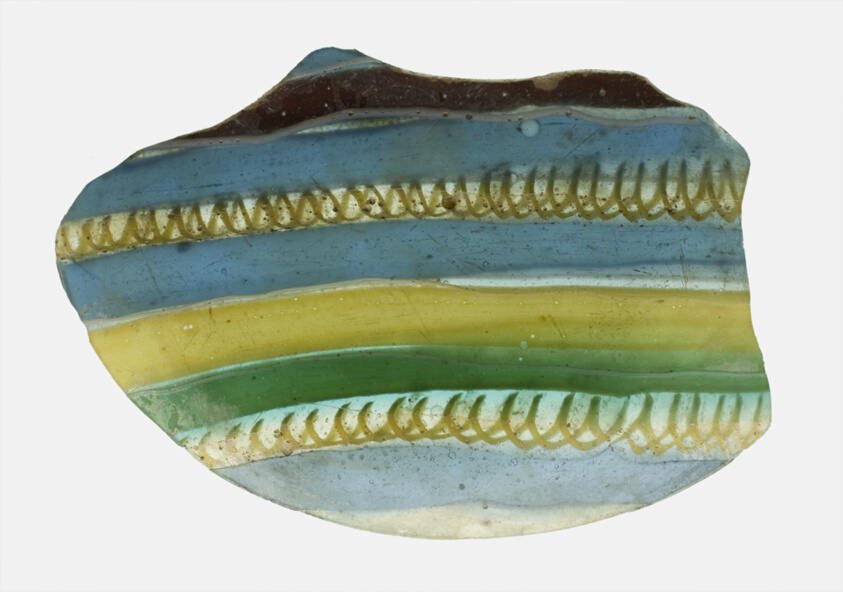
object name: Decorative Arts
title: Bowl Fragment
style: roman (ancient, style or period), ancient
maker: Roman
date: 1st century BCE-1st century CE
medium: Glass, ribbon technique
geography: Roman Empire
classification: fragment; bowl; decorative arts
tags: decoration